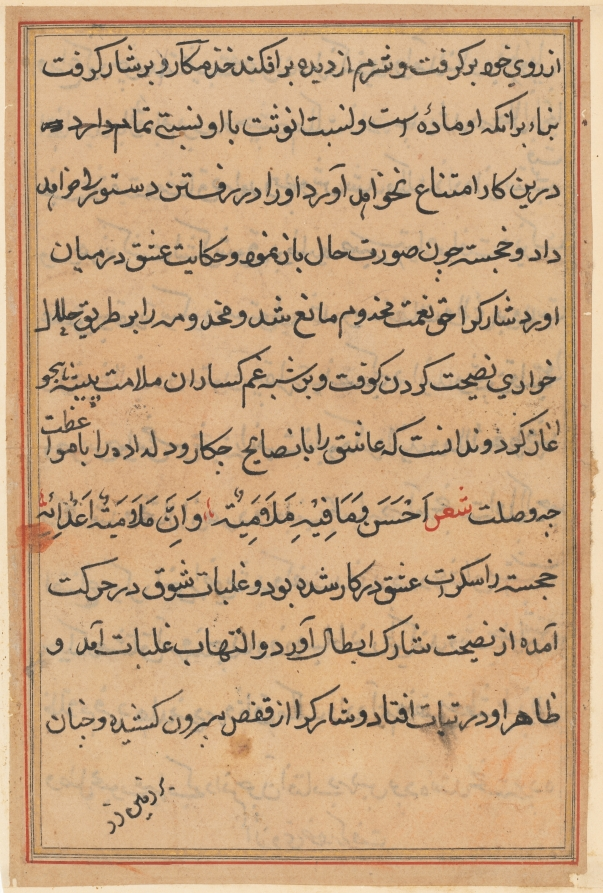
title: Page from Tales of a Parrot (Tuti-nama): text page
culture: Mughal India, court of Akbar (reigned 1556–1605)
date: c. 1560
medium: gum tempera, ink, and gold on paper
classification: Painting